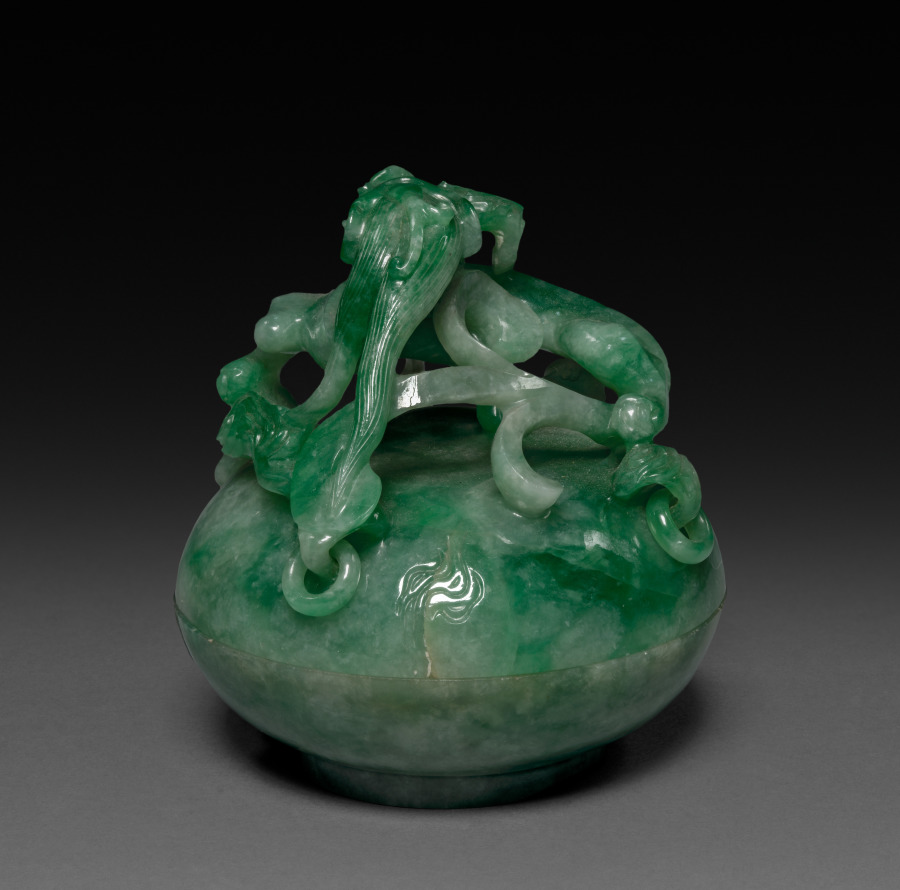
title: Three-Sectional Altar Group: Small Bowl with Carved Dragon with Lid and Base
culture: China, Qing dynasty (1644-1911)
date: 1644–1911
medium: jade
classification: Jade